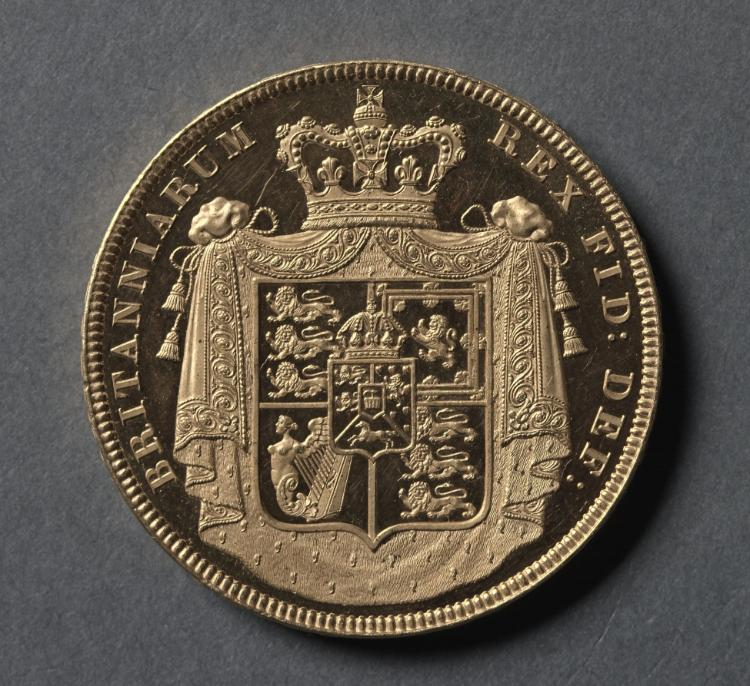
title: Five Pound Piece: Crowned and Heavily Mantled Shield of Arms (reverse)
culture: England, George IV, 1820-1830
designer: Jean Baptiste Merlen (French, 1769–1850)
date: 1826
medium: gold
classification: Coins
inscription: BRITANNIARUM.REX FID: DEF